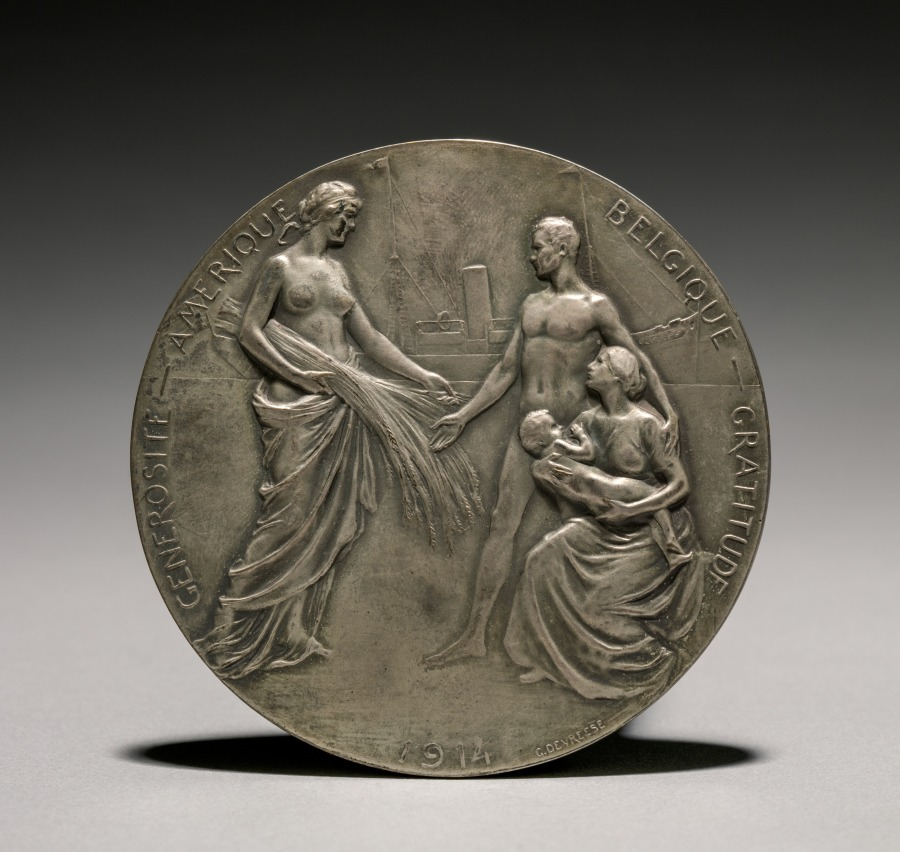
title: Medal (reverse)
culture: Belgium, early 20th century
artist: Godefroid Devreese (Belgian, 1861–1941)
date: 1914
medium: bronze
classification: Metalwork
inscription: "Generosite -- Amerique. Belgique -- Gratitude"; signed: "1914 G. Devreese."